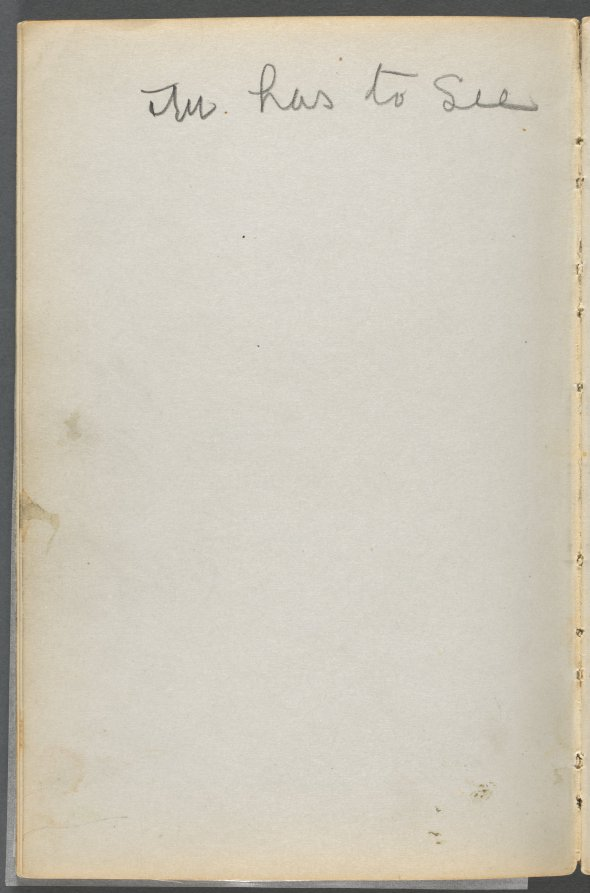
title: Sketchbook, The Dells, N° 127, page 056: Notes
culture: America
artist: Maurice Prendergast (American, born Newfoundland [now Canada], 1858–1924)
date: c. 1919–1921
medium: graphite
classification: Bound Volume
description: This sketchbook contains 59 pages of graphite drawings and 16 watercolors made at various locations on Cape Ann, Massachusetts.